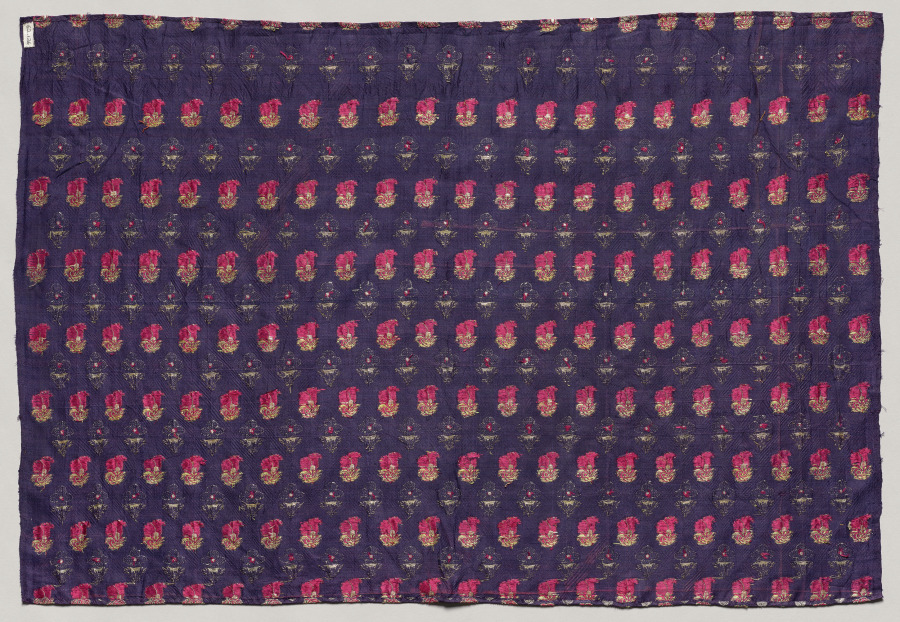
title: Fragment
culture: India, Benares ?, 19th century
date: 1800s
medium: brocade, "kimkhwab"; silk with gold and silver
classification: Textile